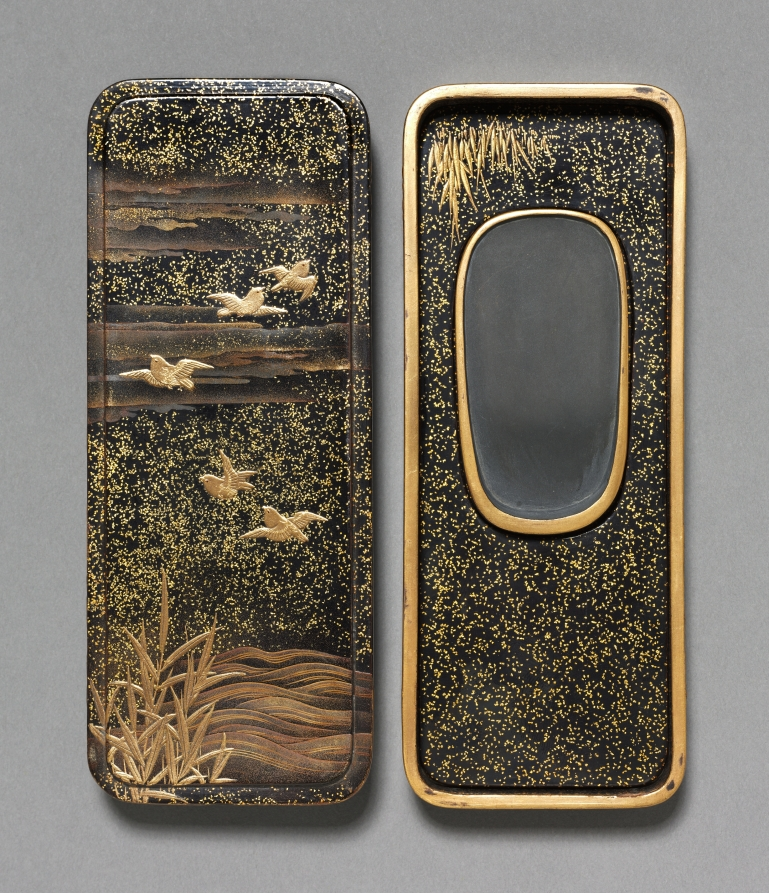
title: Box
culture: Japan, Edo period (1615–1868)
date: 1800s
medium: lacquer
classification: Lacquer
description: For the cover designs on writing boxes, Chinese motifs like Mt. Penglai (Horai-zan in Japanese), the island of immortality, remained popular. A landscape with a river, buildings, mountains, trees, and clouds decorates the top of this portable writing box while the inside is embellished with clouds, birds, water, and grasses and offers a space for a tiny ink stone.